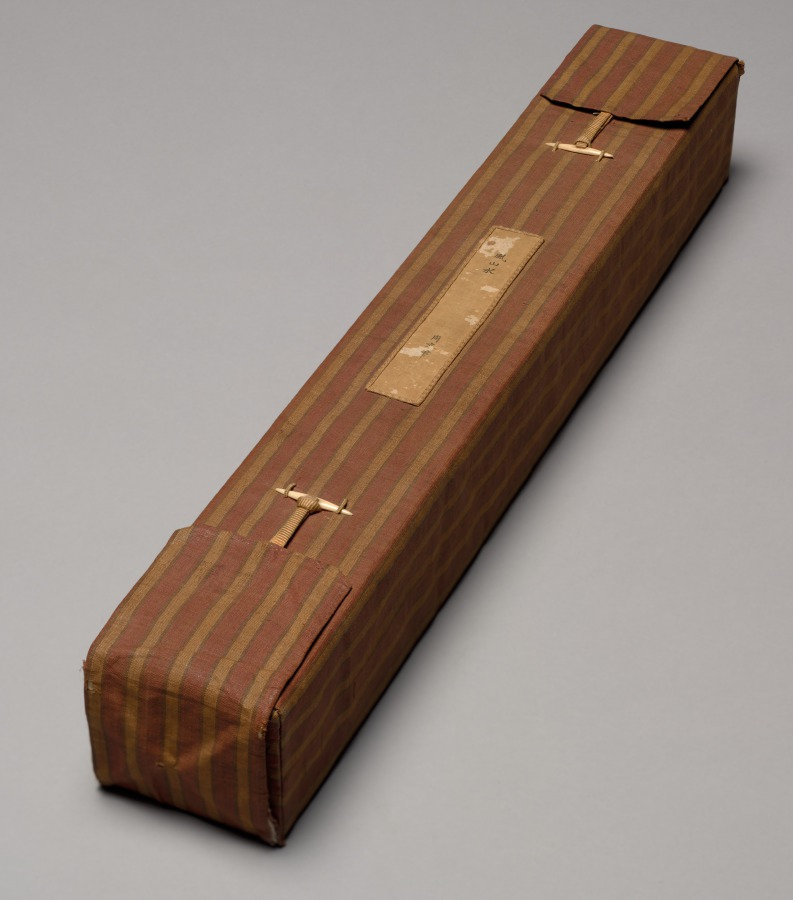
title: Windy Landscape with Sailboat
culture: Japan, Muromachi period (1392–1573)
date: mid-1400s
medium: hanging scroll; ink on paper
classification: Painting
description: Windy Landscape depicts the humble waterside retreat of an official retired from government service. For government officials, retreating from the city to a remote locale was the ideal retirement, though difficult to attain. In this scroll the retiree gazes out over the watery expanse past the sailboat to the mist-covered mountain in the far distance. The artist has achieved this depth of composition through carefully placed brushstrokes and ink washes.